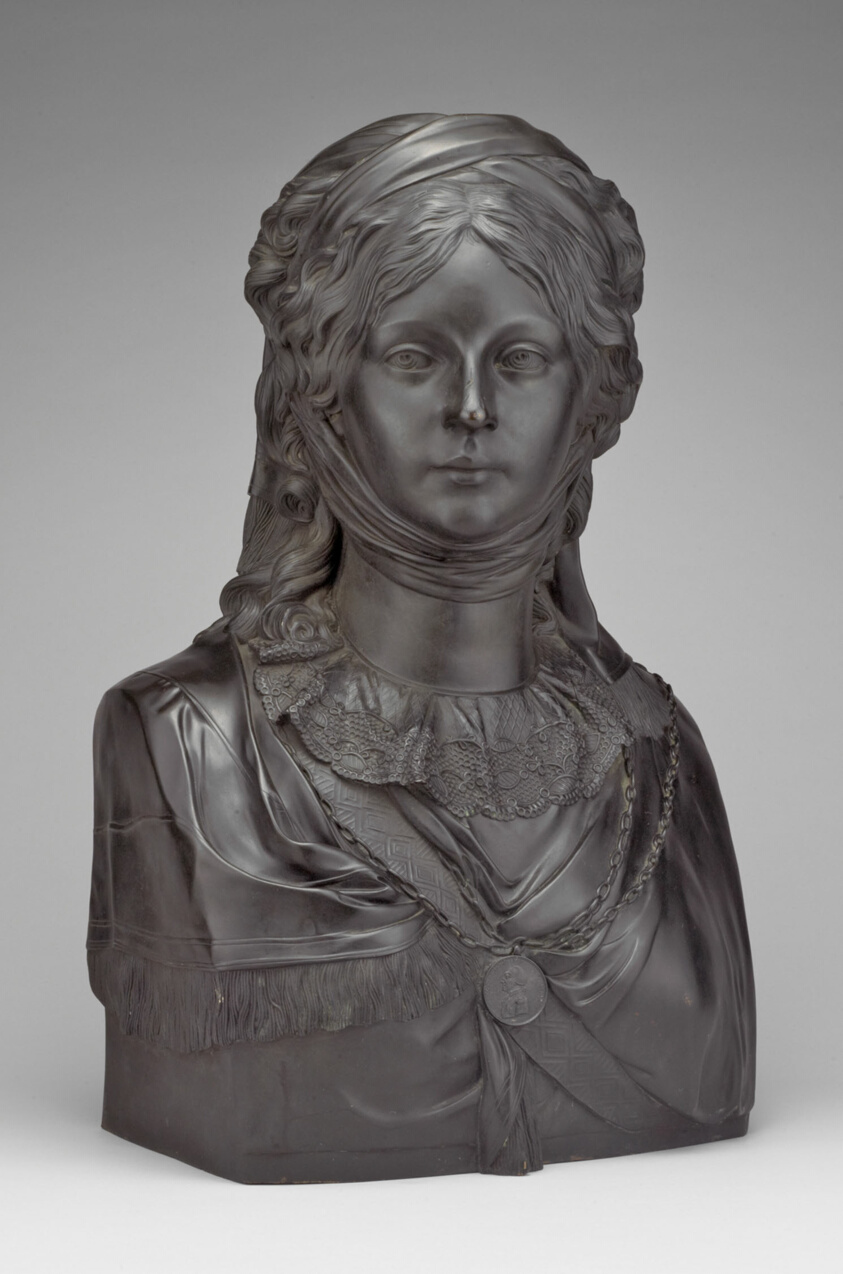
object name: Sculpture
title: Queen Louise of Prussia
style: 18th Century, 19th century, nineteenth century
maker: Johann Gottfried Schadow (German, 1764–1850); Cast by Werner Foundry (German, 1794/95–1842)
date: Modeled 1799, cast 1819–21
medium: Bronze with black patina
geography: Germany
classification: bust/head; sculpture; bronze; german; portrait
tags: portraits: female subject, medallions, head, busts, nobility, queens, royal, woman, portrait, portraits